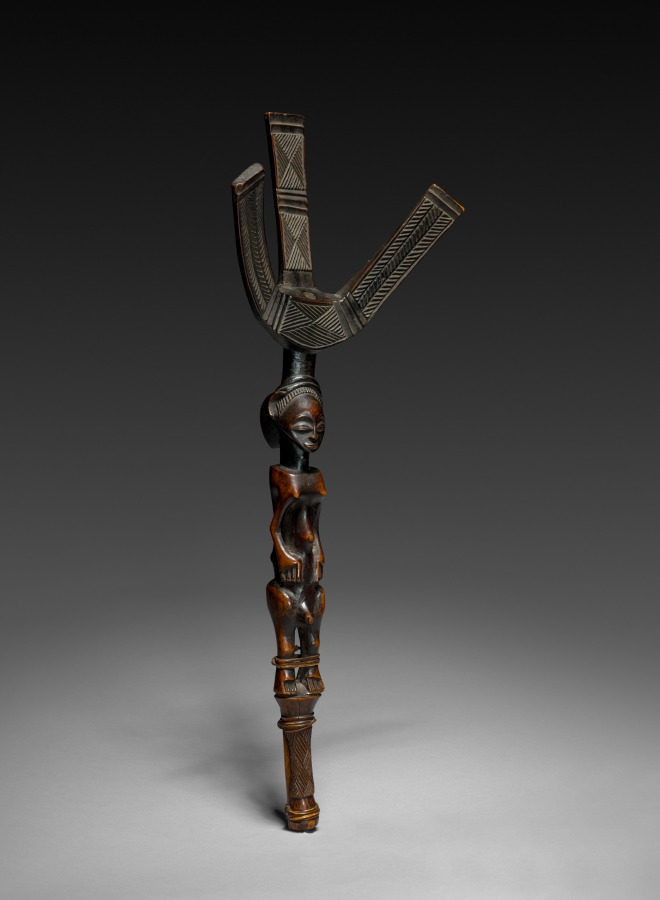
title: Bow Stand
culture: Africa, Central Africa, Democratic Republic of Congo, Luba-style carver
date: 1800s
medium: Wood and plant fiber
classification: Sculpture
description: A powerful symbol of the Luba king, bow stands were ceremonial objects that resided within the king’s private vicinity in the palace and were never displayed in public. Typically, bow stands depict a female figure, but the sculptor has carved a figure with ambiguously gendered human traits. This is a symbolic depiction that may allude to how divine rulers (mulopwe) were believed to have both “male” and “female” character traits, which allowed this sculpture to act as a vessel for spirits of any gender.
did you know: The shape of this wooden bow stand is based on a more practical version in metal used by hunters.